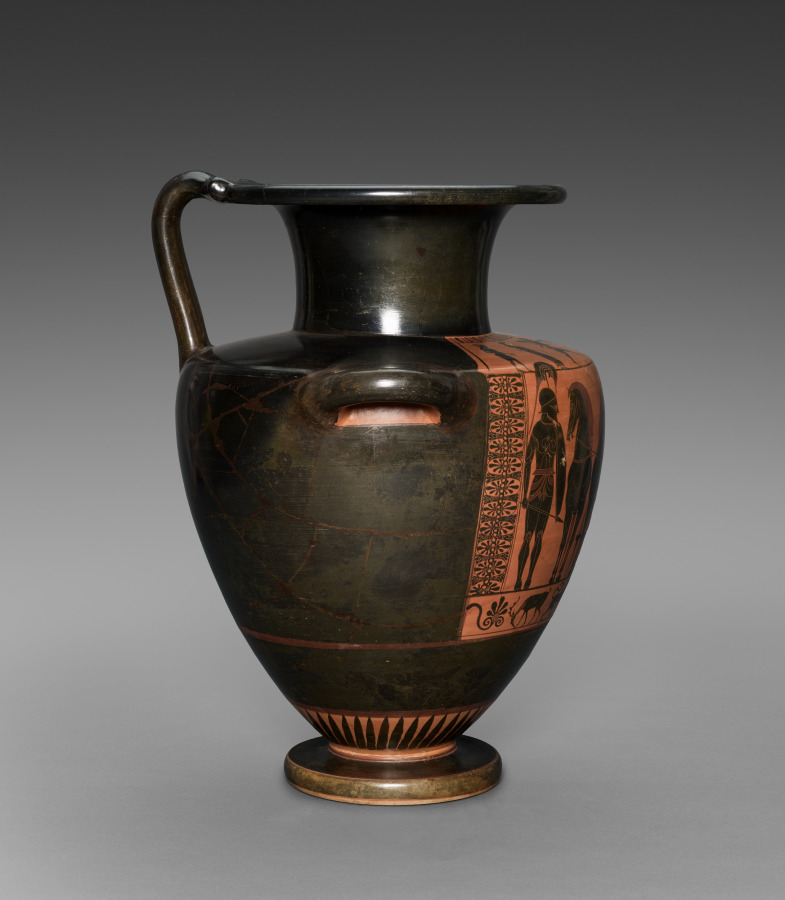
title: Black-Figure Hydria (Water Vessel): Frontal Quadriga (Body); Theseus and Minotaur (Shoulder)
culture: Greece, Attic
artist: attributed to Antimenes Painter (Greek, Attic, active c. 530–510 BCE)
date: c. 520 BCE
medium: ceramic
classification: Ceramic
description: Although their subjects differ, the three fields of figured decoration on this vessel relate to one another metaphorically through the theme of victory. Just as Theseus defeats the Minotaur on the shoulder, two lions converge on a deer in the predella (the small, lowermost panel). In the largest panel, victory is still to come, presumably for all three warriors shown: one in the chariot behind his driver, and one on foot on either side. Somewhat unusually, two of the warriors look directly out at the viewer, their frontal faces an interesting complement to the much more common frontal chariot.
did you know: This type of water vessel, a hydria, takes its name from hudor, Greek for water (and still familiar in the English root hydro).